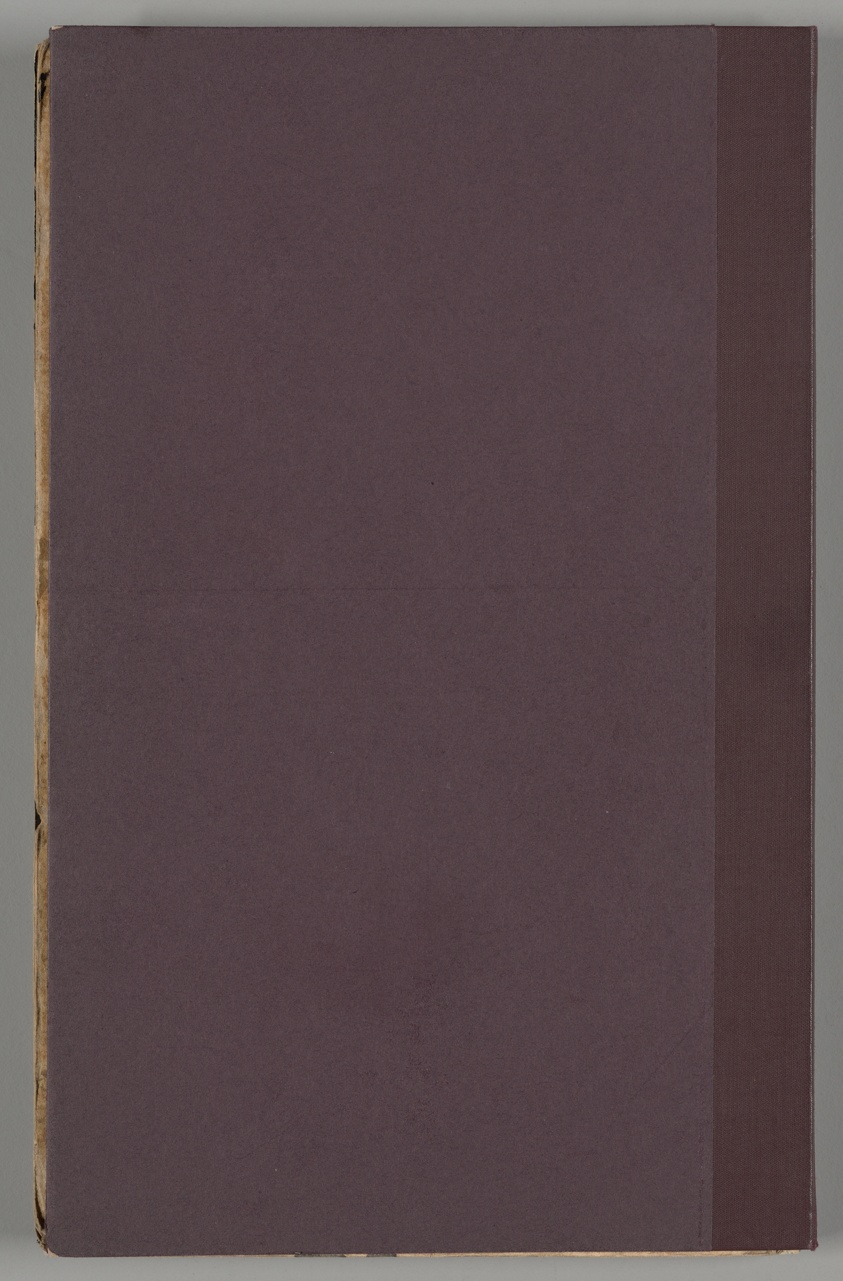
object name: Book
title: Soken sekisatsu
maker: Ito Jakuchu (Japanese, 1716-1800)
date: 1767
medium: Woodblock printed book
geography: Japan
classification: book